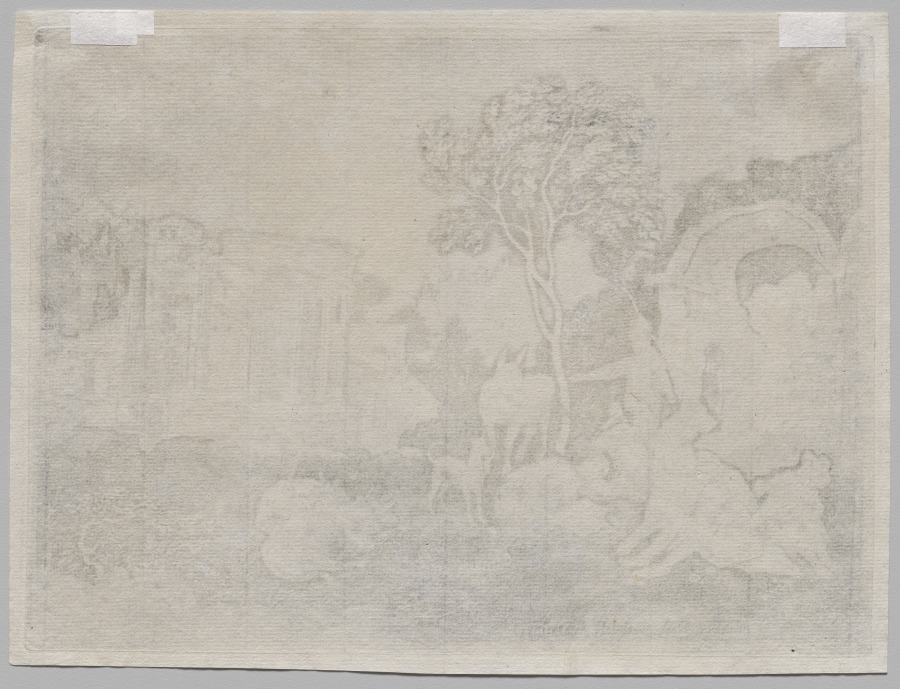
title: Pastoral Landscape with Ruins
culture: Netherlands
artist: Gerhardt Janssen (Dutch, 1636–1725)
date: c. 1722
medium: etching and open-bite on laid paper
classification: Print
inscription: Signed, lower left, in plate: Gerhardt Janssen. fecit Wienn [in reverse]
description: Janssen’s prints depict figures, trees, and architectural details rendered light against a dark background, a reverse effect of the typical etching of the period, which reminds our modern eye of a photographic negative. The artist might have been familiar with such a reversal of light and dark through the practice of reverse glass painting, in which he was trained, and indeed, the figures glow with an idiosyncratic solarizing effect, almost as if they are part of a window. The technique was apparently invented by Janssen and is unique in early modern art.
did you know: This print was made from an iron print plate that was etched in acid in stages, creating a textured, almost corrosive effect.